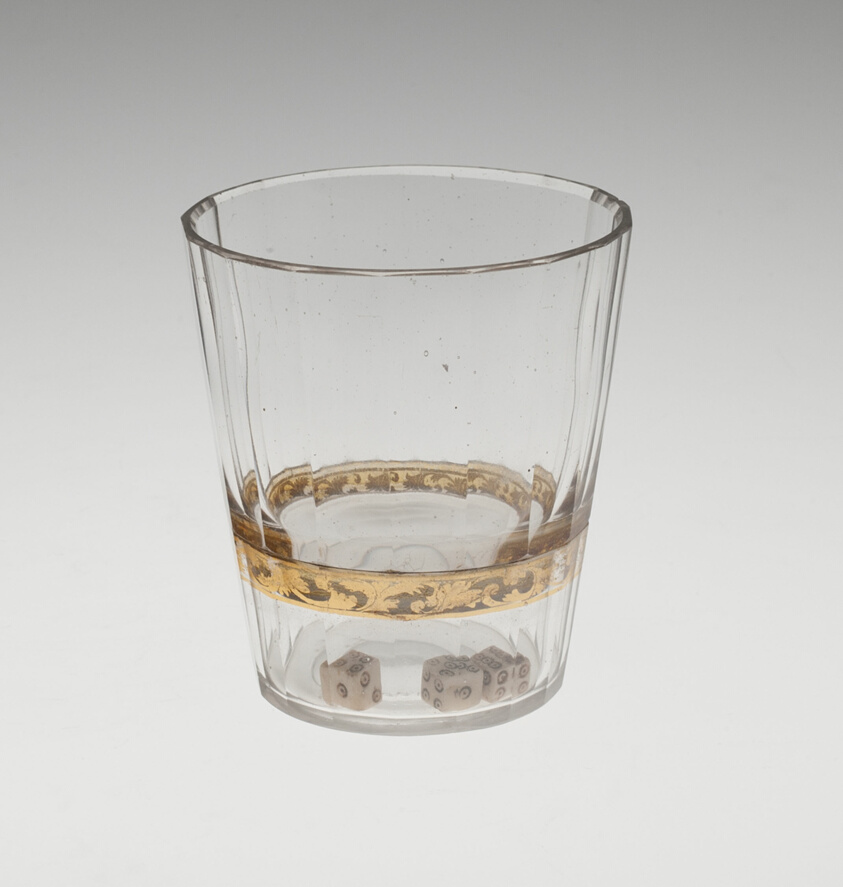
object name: Glass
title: Beaker (Zwischengoldglas) Incorporating Three Dice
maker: Bohemia, Czech Republic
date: c. 1730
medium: Glass with engraved gold leaf decoration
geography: Bohemia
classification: drinking vessel; glass; european decorative arts